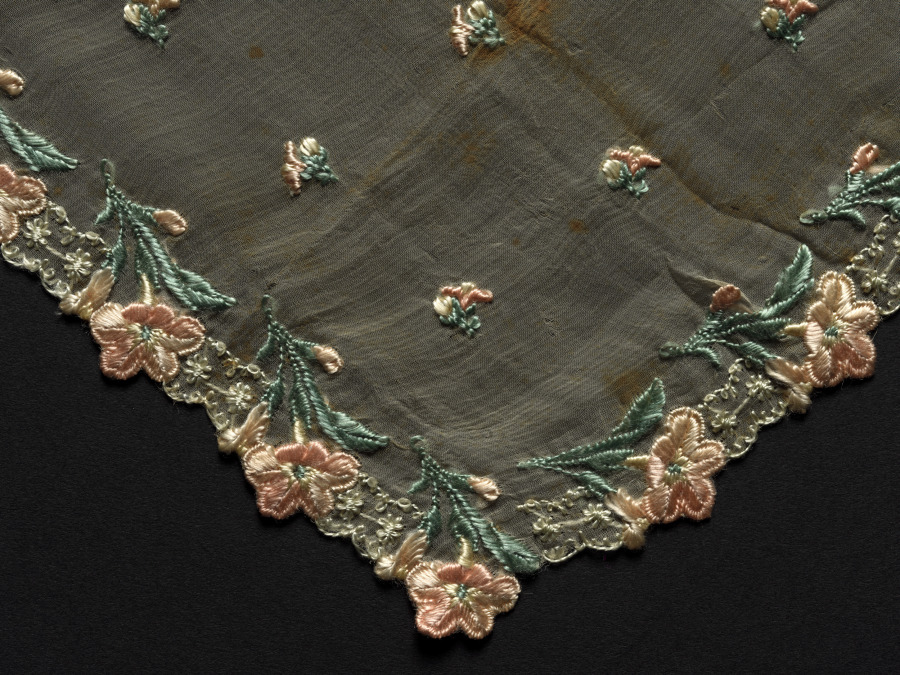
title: Lace Handkerchief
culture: Cuba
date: 1889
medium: Plain weave piña, silk embroidery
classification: Embroidery